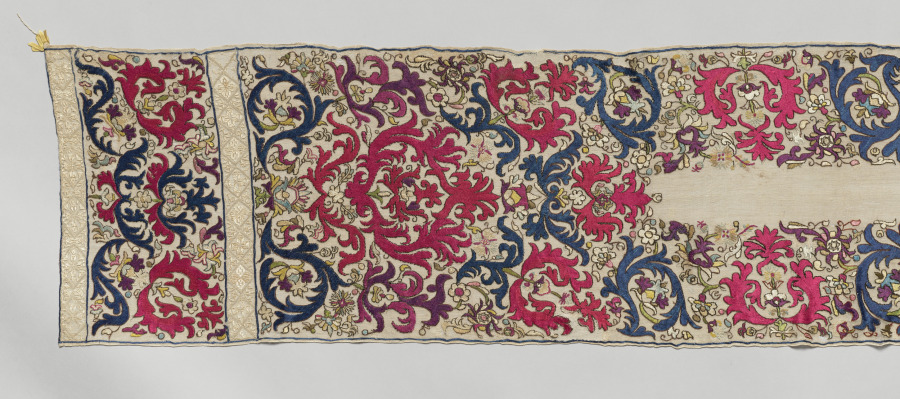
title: Headkerchief (tensifa)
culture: Africa, North Africa, Algeria, Algerian embroiderer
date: 1700s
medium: Linen, silk, gold, silver, dye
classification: Embroidery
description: This beautiful kerchief, worn wrapped around the head, was part of elegant bathing equipment that well-to-do women wore while relaxing in a hammam after bathing. The floral and foliate embroidery reflect a fashion that lasted for more than a century. This example is dominated by brilliant crimson and blue silk stitches.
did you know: This textile was displayed in the CMA’s first exhibition in 1916. While it is from North Africa, it was displayed in the "Nearer East" gallery.